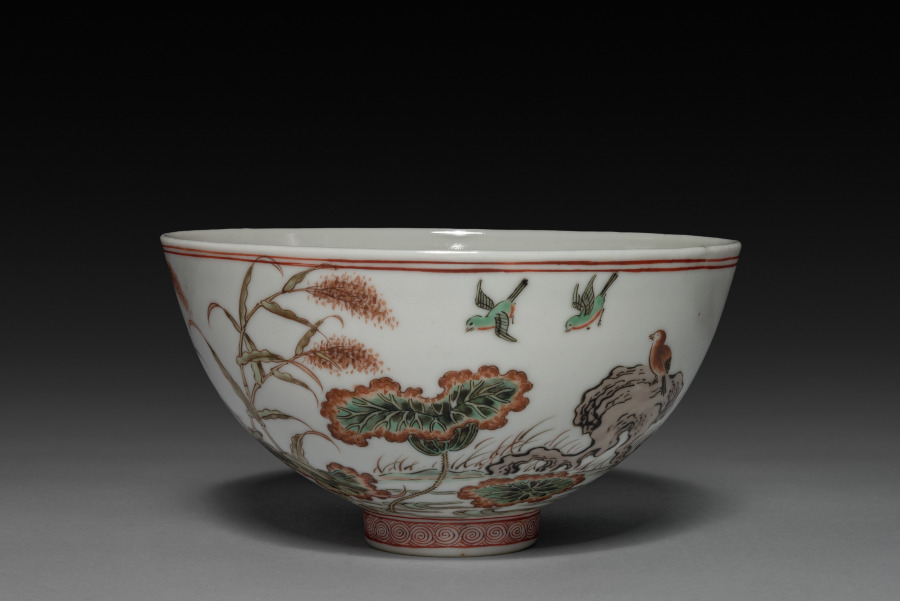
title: Bowl with Waterfowl on a Lotus Pond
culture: China, Jiangxi province, Jingdezhen kilns, Qing dynasty (1644-1911), Kangxi reign (1662-1722)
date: 1662–1722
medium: porcelain with famille verte overglaze enamel decoration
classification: Ceramic